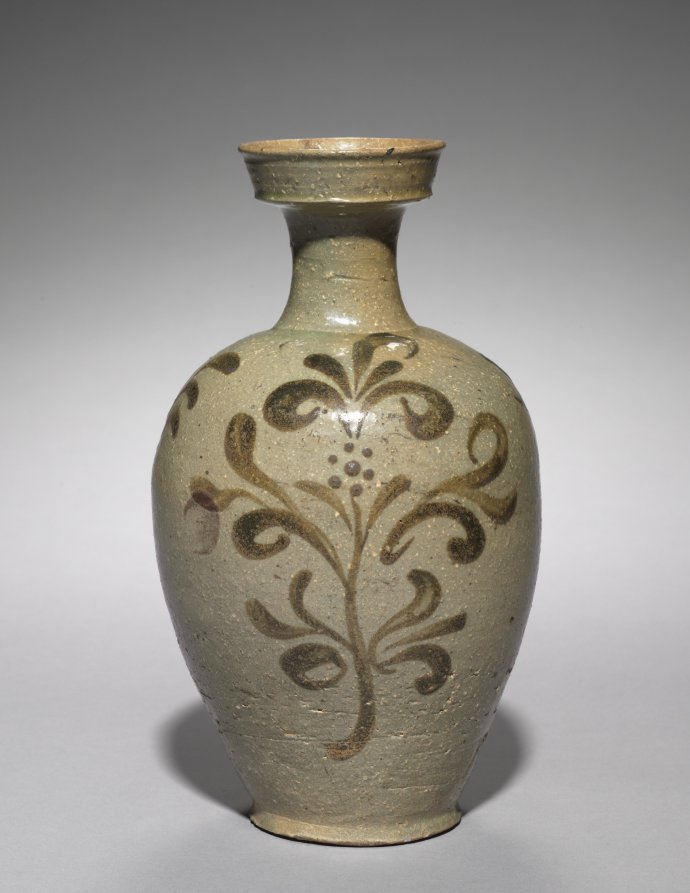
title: Vase with Floral Design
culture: Korea, Goryeo dynasty (918–1392)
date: 1100s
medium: celadon with underglaze iron-brown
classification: Ceramic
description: This bottle painted with iron-rich pigment beneath celadon glaze was probably produced in Haenam kilns in southern Jella province. The method that paints patterns in iron-oxide pigment is believed to have developed in kilns in China, such as Xicun in Guangzhou, Cizhou and Ding in Hebei province, and Yaozhou in Shaanxi province around the 900s.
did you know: This bottle was painted with iron-rich pigment beneath celadon glaze.